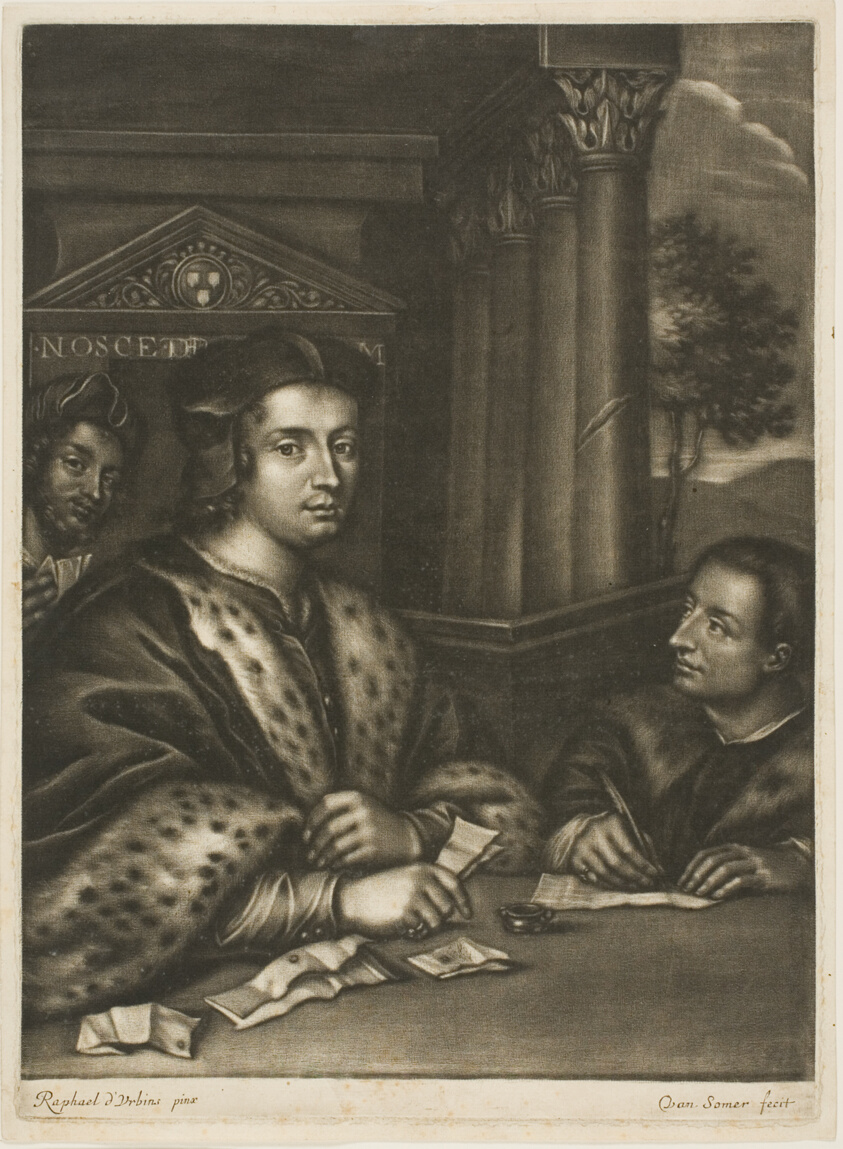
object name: Print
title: Carondelet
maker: Jan van Somer (Dutch, 1645-1699); after Raffaello Sanzio, called Raphael (Italian, 1483-1520)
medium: Mezzotint on ivory paper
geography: Netherlands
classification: mezzotint; print; prints and drawing